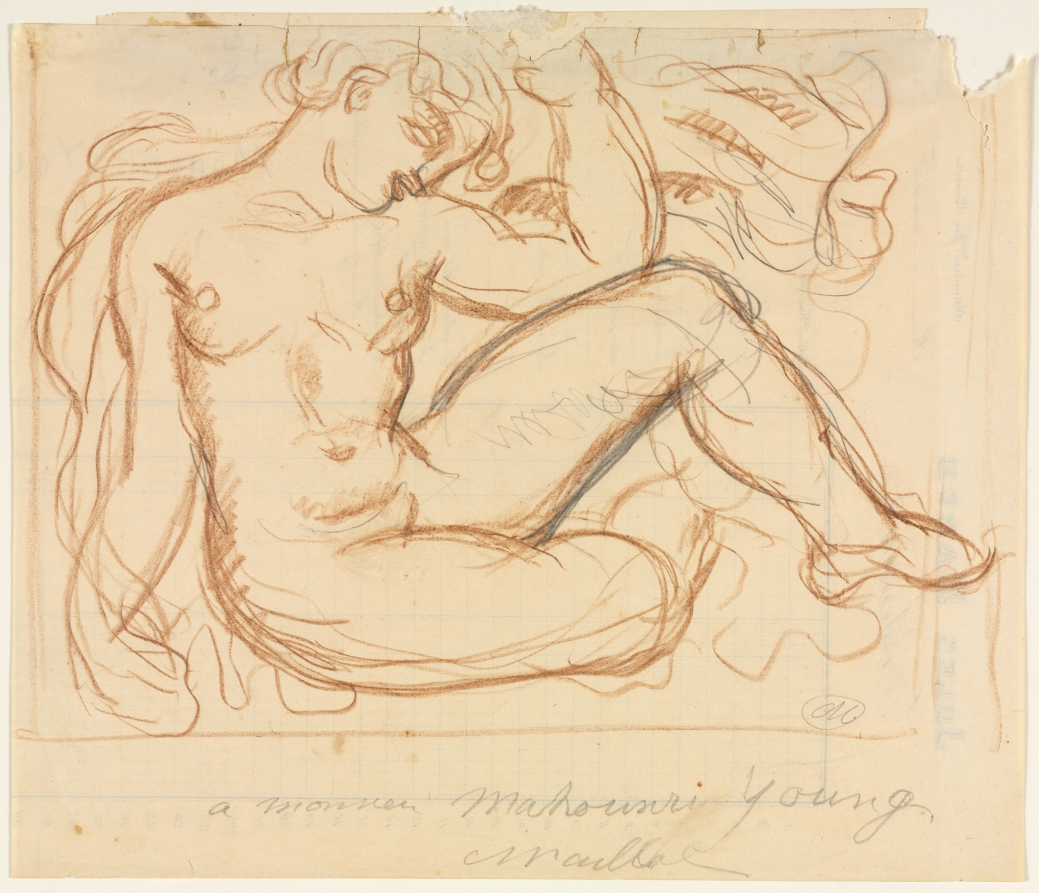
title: Nude Study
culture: France, 20th century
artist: Aristide Maillol (French, 1861–1944)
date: 1881–1944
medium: red brown crayon or colored pencil and graphite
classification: Drawing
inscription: Signed, lower right in graphite M [within a circle] Inscribed, bottom in pencil, a Monsieur Mahounri Young [sic], Maillol [Mahonri Young, American sculptor and artist, 1877-1957] Inscribed (verso) in black crayon: MAHONRI YOU